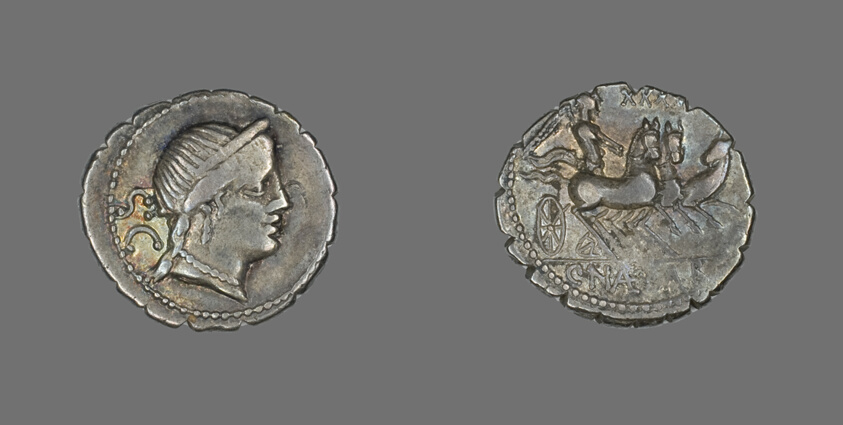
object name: Coin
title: Denarius Serratus (Coin) Depicting the Goddess Venus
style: roman (ancient, style or period), ancient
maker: Roman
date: about 79 BCE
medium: Silver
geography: Roman Empire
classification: coin; ancient art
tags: Chariots